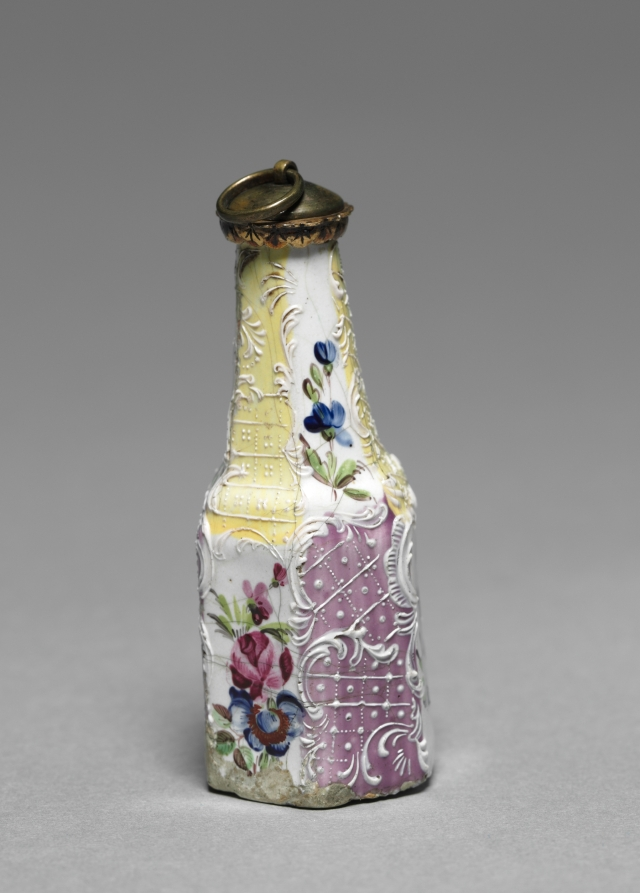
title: Scent Bottle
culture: England, Staffordshire, 18th century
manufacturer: South Staffordshire Factory (British)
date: 1775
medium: enamel on copper with gilt and enameled metal mounts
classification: Miscellaneous